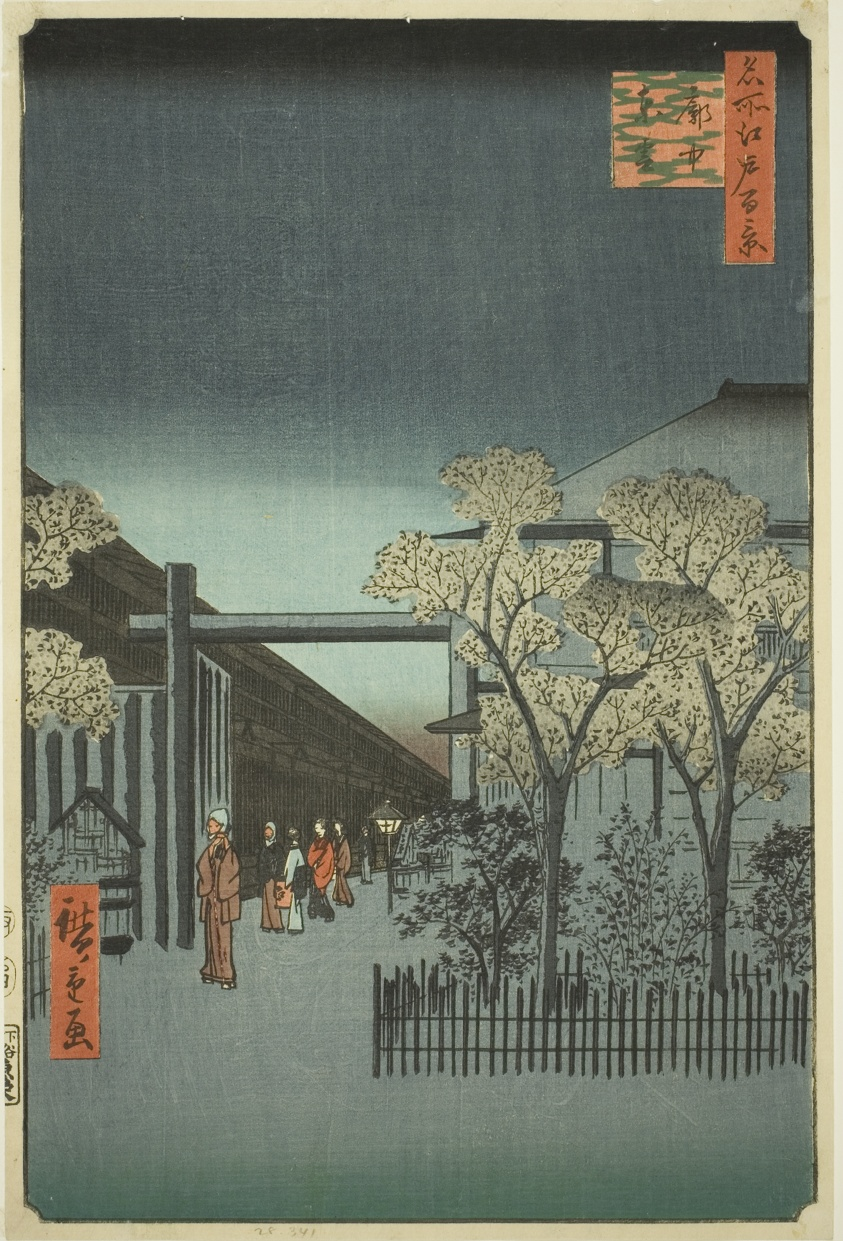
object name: Print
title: Yoshiwara Licensed Quarters at Dawn (Kakuchu shinonome), from the series "One Hundred Famous Views of Edo (Meisho Edo hyakkei)"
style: Japanese (culture or style)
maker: Utagawa Hiroshige 歌川 広重; Japanese, 1797-1858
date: 1857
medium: Color woodblock print; oban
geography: Japan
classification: print; asian art